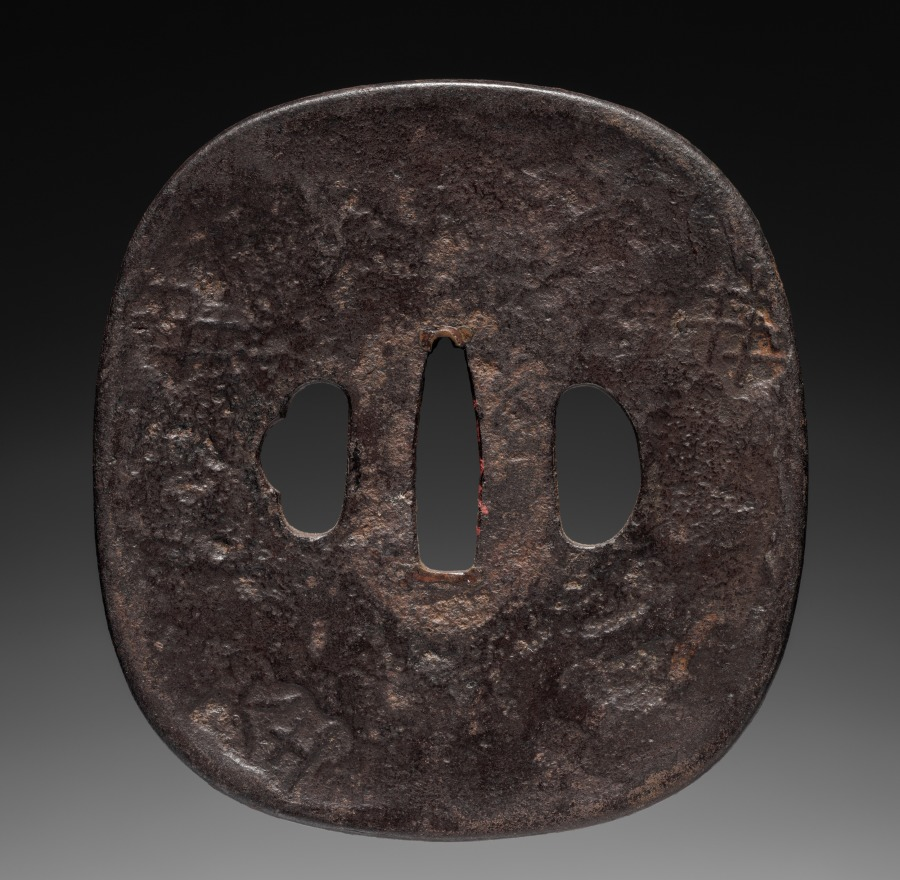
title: Sword Guard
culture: Japan, Momoyama period (1573–1615)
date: late 1500s-early 1600s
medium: iron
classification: Arms and Armor